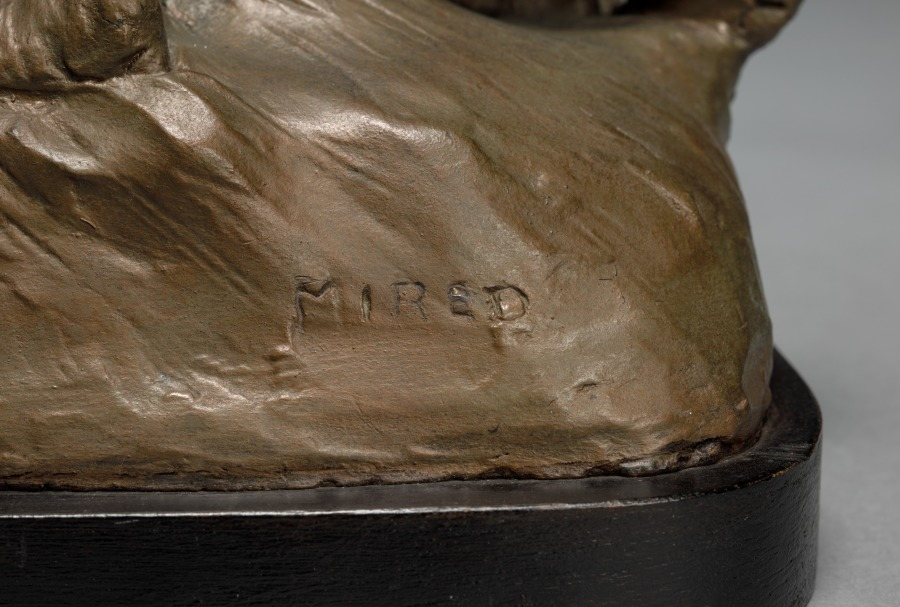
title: Mired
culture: America, Ohio, Cleveland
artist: John Ross Stewart (American, 1872–1954)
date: 1920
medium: plaster painted to resemble patinated green bronze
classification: Sculpture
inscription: incised in plaster near base: "Mired" and "JRS."